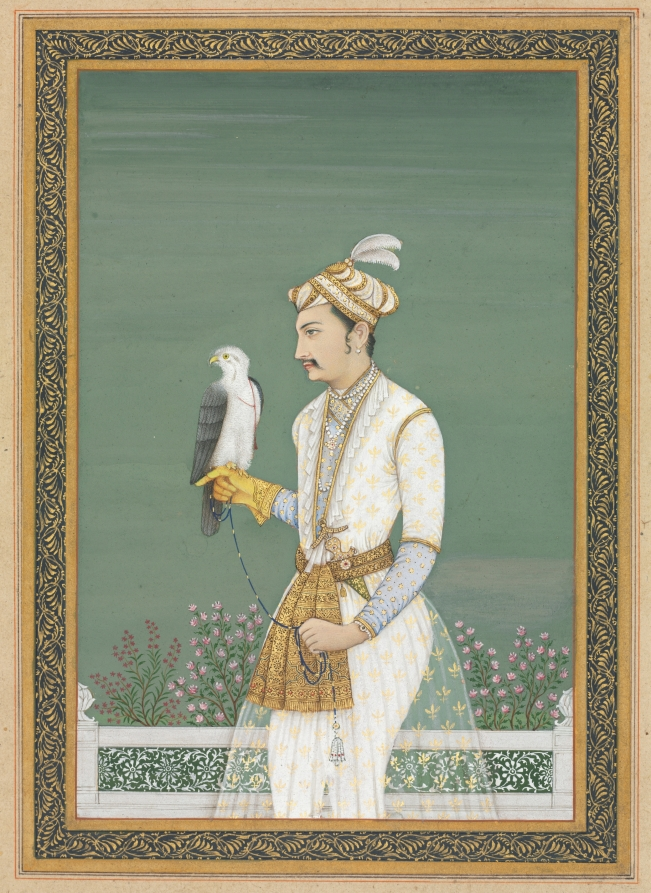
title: Portrait of a Prince with a Hawk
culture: India, Mughal, 18th century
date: 1700s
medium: Gum tempera and gold on paper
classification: Painting